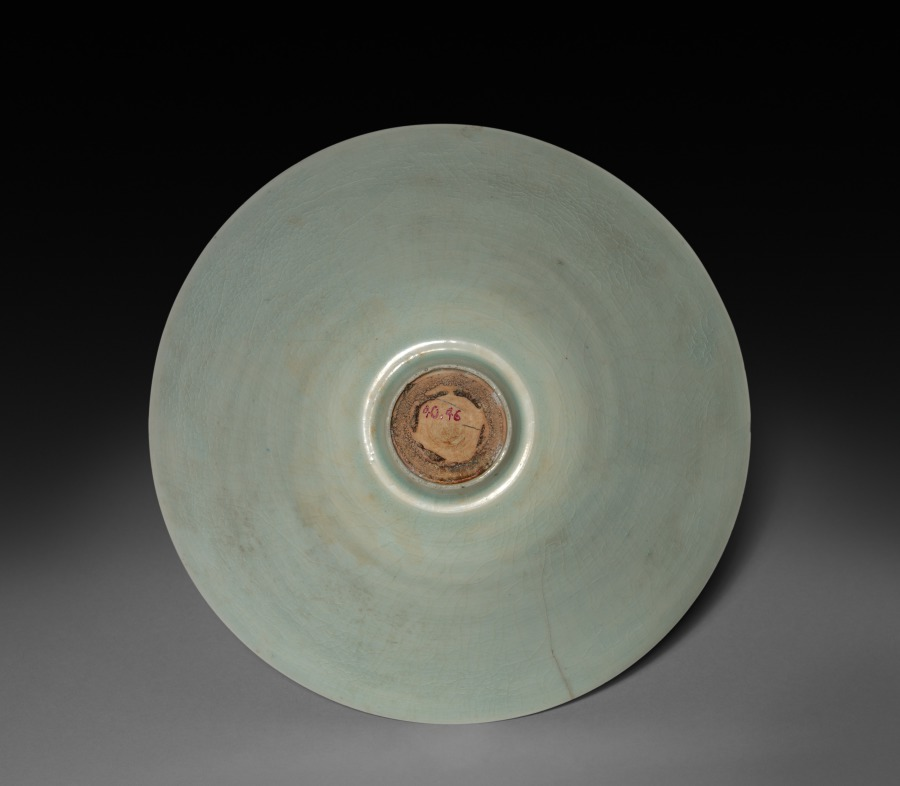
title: Coniform Bowl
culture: China, Song dynasty (960-1279)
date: 960–1279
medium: White porcelain, Yingqing ware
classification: Ceramic